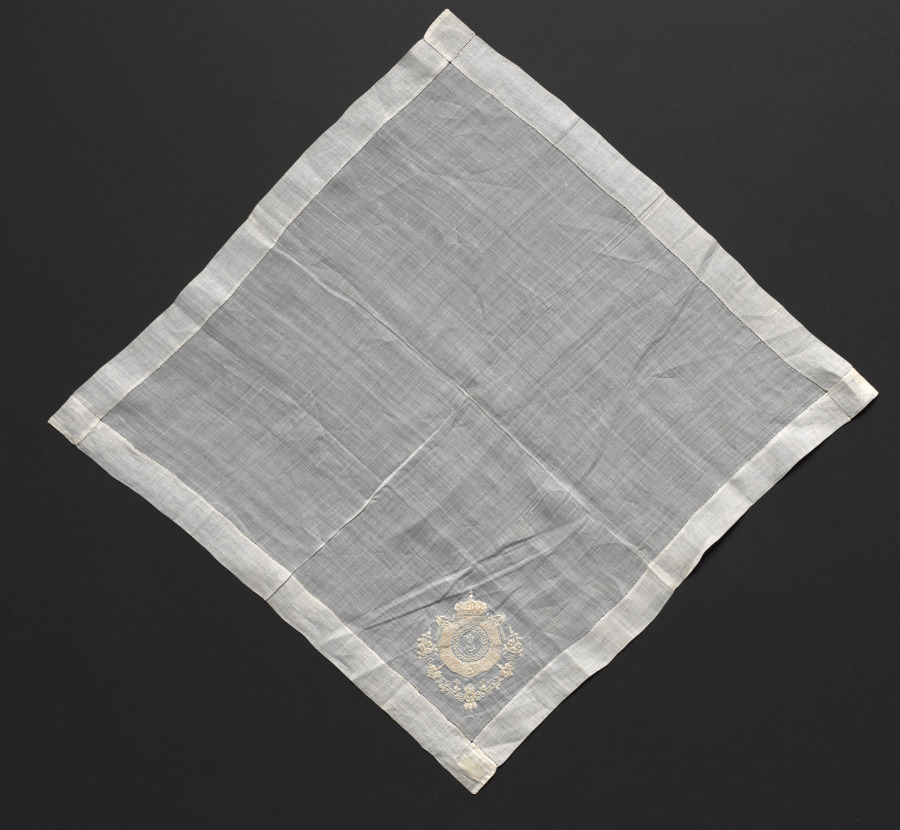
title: Handkerchief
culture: France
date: 1800s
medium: Plain weave linen, embroidered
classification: Embroidery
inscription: "E."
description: A letter E, for Empress Eugenie, and a crown are embroidered in white in one corner of this handkerchief.